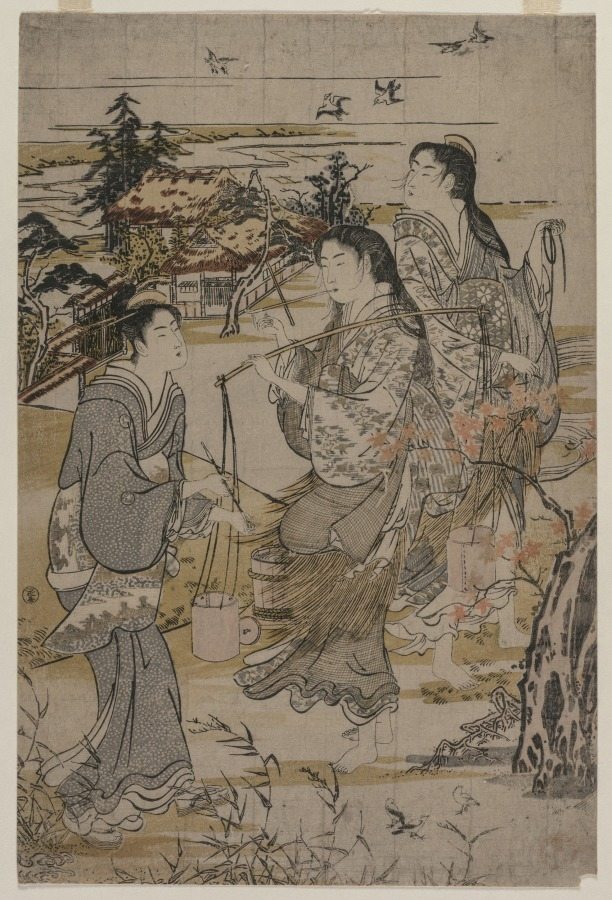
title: Women with Salt Pails; The Noda Tama River in Mutsu Province, from an untitled series of the Six Tama Rivers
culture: Japan, Edo period (1615–1868)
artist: Kubo Shunman (Japanese, 1757–1820)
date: late 1780s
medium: color woodblock print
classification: Print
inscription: Signature: Shumman ga Artist Seal: Shumman Publisher: Fushimiya Zenroku (Fushizen)